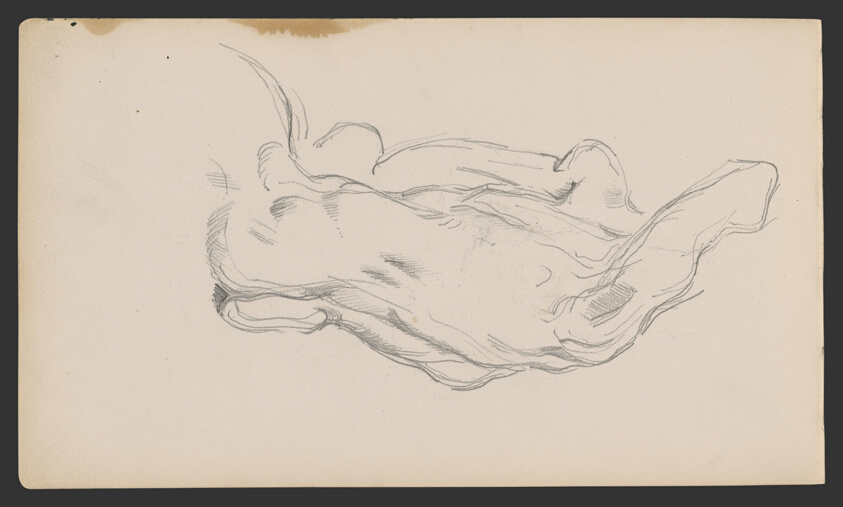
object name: Drawing and Watercolor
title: Sketchbook No. 2 (L'Estaque)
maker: Paul Cézanne; French, 1839-1906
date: 1875–86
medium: Graphite and pen and ink drawings on paper, bound into a book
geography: France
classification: sketchbook; graphite; prints and drawing; paper